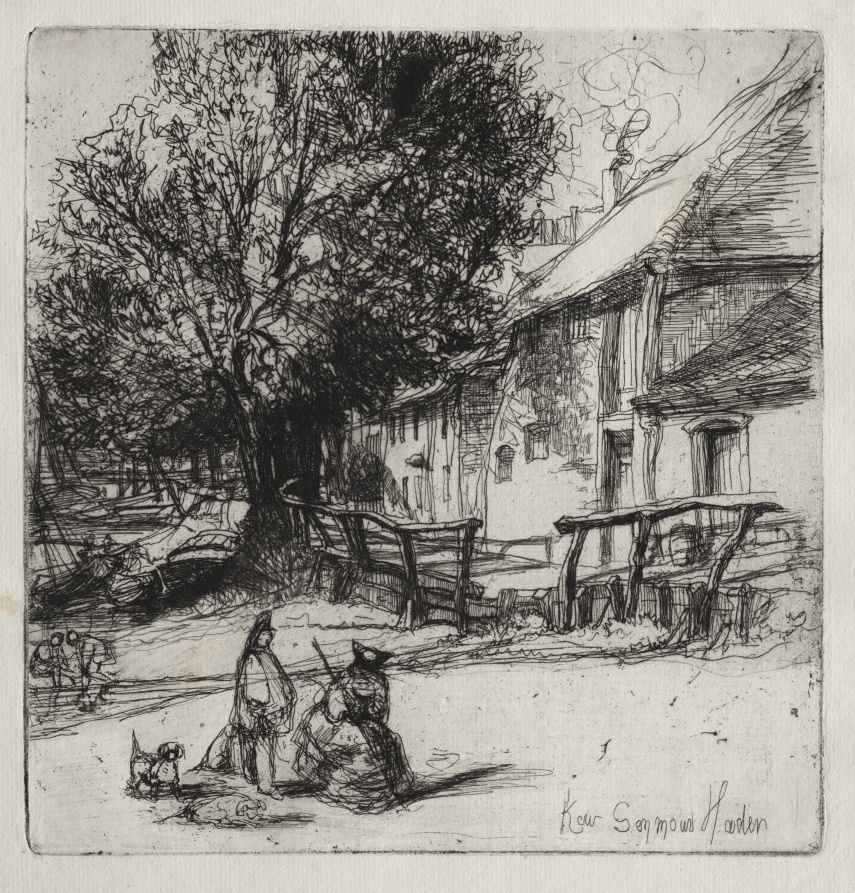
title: Kew Side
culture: England, 19th century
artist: Francis Seymour Haden (British, 1818–1910)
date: 1864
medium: etching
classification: Print